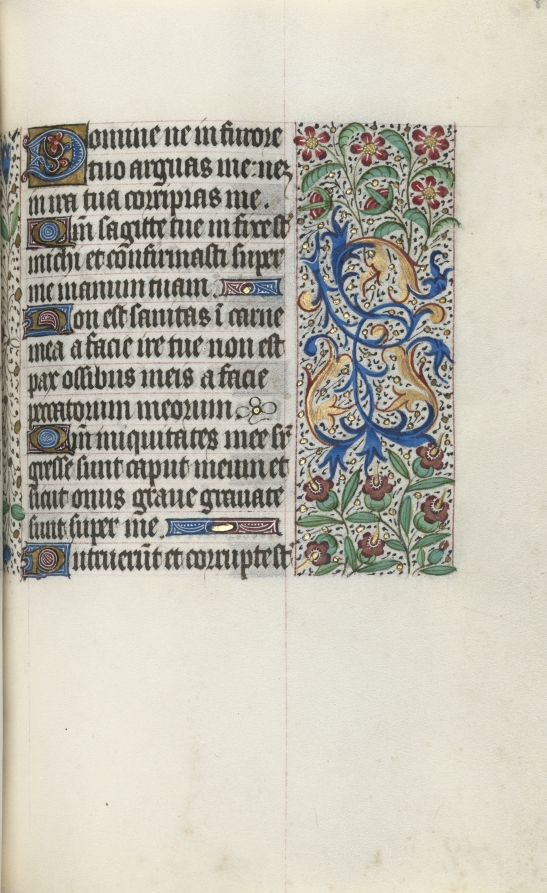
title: Book of Hours (Use of Rouen): fol. 83r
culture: France, Rouen, 15th century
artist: Master of the Geneva Latini (French, active Rouen, 1460–80)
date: c. 1470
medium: ink, tempera, and gold on vellum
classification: Bound Volume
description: In the late 1400s and early 1500s Rouen was an established and important center of book production. The city’s cathedral had a wealthy chapter that spent large sums of money to commission books and to maintain its extensive library. The stationers and booksellers would have likely been concentrated in or near the cathedral precinct. This artist, named after a manuscript now in Geneva, was Rouen’s principal illuminator during the second half of the 1400s.